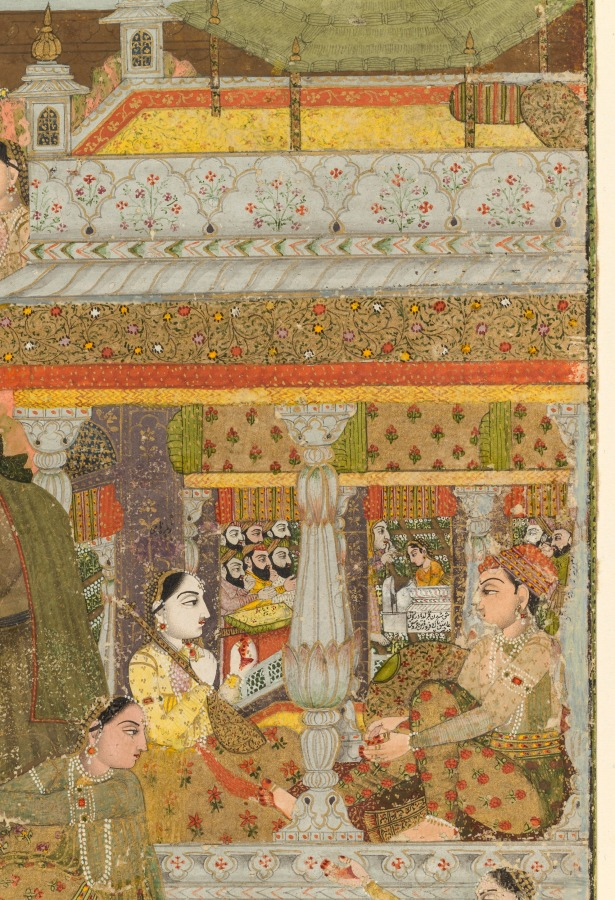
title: Lovers and beloveds: A composite of scenes from Persian, Urdu, and Sanskrit literature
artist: Chitarman II (Indian, c. 1680–с. 1750)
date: c. 1735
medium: Gum tempera and gold on paper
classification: Painting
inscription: Persian inscriptions throughout, in nasta‘liq script: Top left: The celebrated lover Ranjha; Top right, above awning: The notable ladies of the city falling into a swoon having caught sight of Joseph’s beauteous countenance; Top center, on pillar beneath canopy: The celebrated lover Vamiq; On another pillar, behind the woman’s head: The celebrated beloved ‘Azra; Upper left, on pillar: King Nala, the lover; Central figure with halo: The coming from the prison and sitting [in state] of the Lord Joseph the Prophet, with the women of the town cutting the palms of their hands and falling down unconscious; Left of center: [. . . cutting palms . . . wine cups fell from their hands . . . state of wonderment . . .]; Central pavilion at left: Sassi, the beloved the lover [Punnun]; Below central figure of Joseph: The stream of milk Shirin the beloved, weeping The death of Farhad, the lover; Lower right, in front of bearded man: Hafiz of Shiraz; Below his decanter: The stick of candy [referring to the woman with whom, according to popular lore, Hafiz was supposed to have fallen in love as a youth]; Behind the pavilion at right: Bride descending into a grave . . .; On the white railing to the left: Khwaja Bu Ali . . .; Bottom left: Queen Padmavati, the beloved, King Ratnasena, the lover; Bottom right: Majnun, the lover; On page held by Majnun: Say, “He is Allah, who is One, Allah the eternal refuge. He neither begets nor is born, Nor is there to Him any equivalent.” [Qur'an, chapter 112]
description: The figure of Joseph, identified by his halo, sits in the center near the top of this painting of heroes and heroines of ten different Persian, Urdu, and Sanskrit romances. The depicted scene occurs after Joseph has been purchased by Zulaykha in Egypt. Zulaykha, wishing to show him off to her friends and acquaintances, invites them to her home where she supplies oranges and knives. When the women see Joseph, they all are so distracted by his divine beauty that they accidentally cut their hands while peeling their oranges, but remain mesmerized by his appearance. The dramatic scene in the center is from the Persian romance of Khusrau and Shirin, in which Farhad, a stonecutter who loved Shirin, threw himself to his death from a mountaintop after hearing news of Shirin’s death, falsely sent to him from his rival Khusrau. The emaciated Majnun is in the lower right corner. Every vignette has been identified with a tiny Persian inscription.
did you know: Below the bearded poet Hafiz is the woman he loved; her name was Stick of Candy.